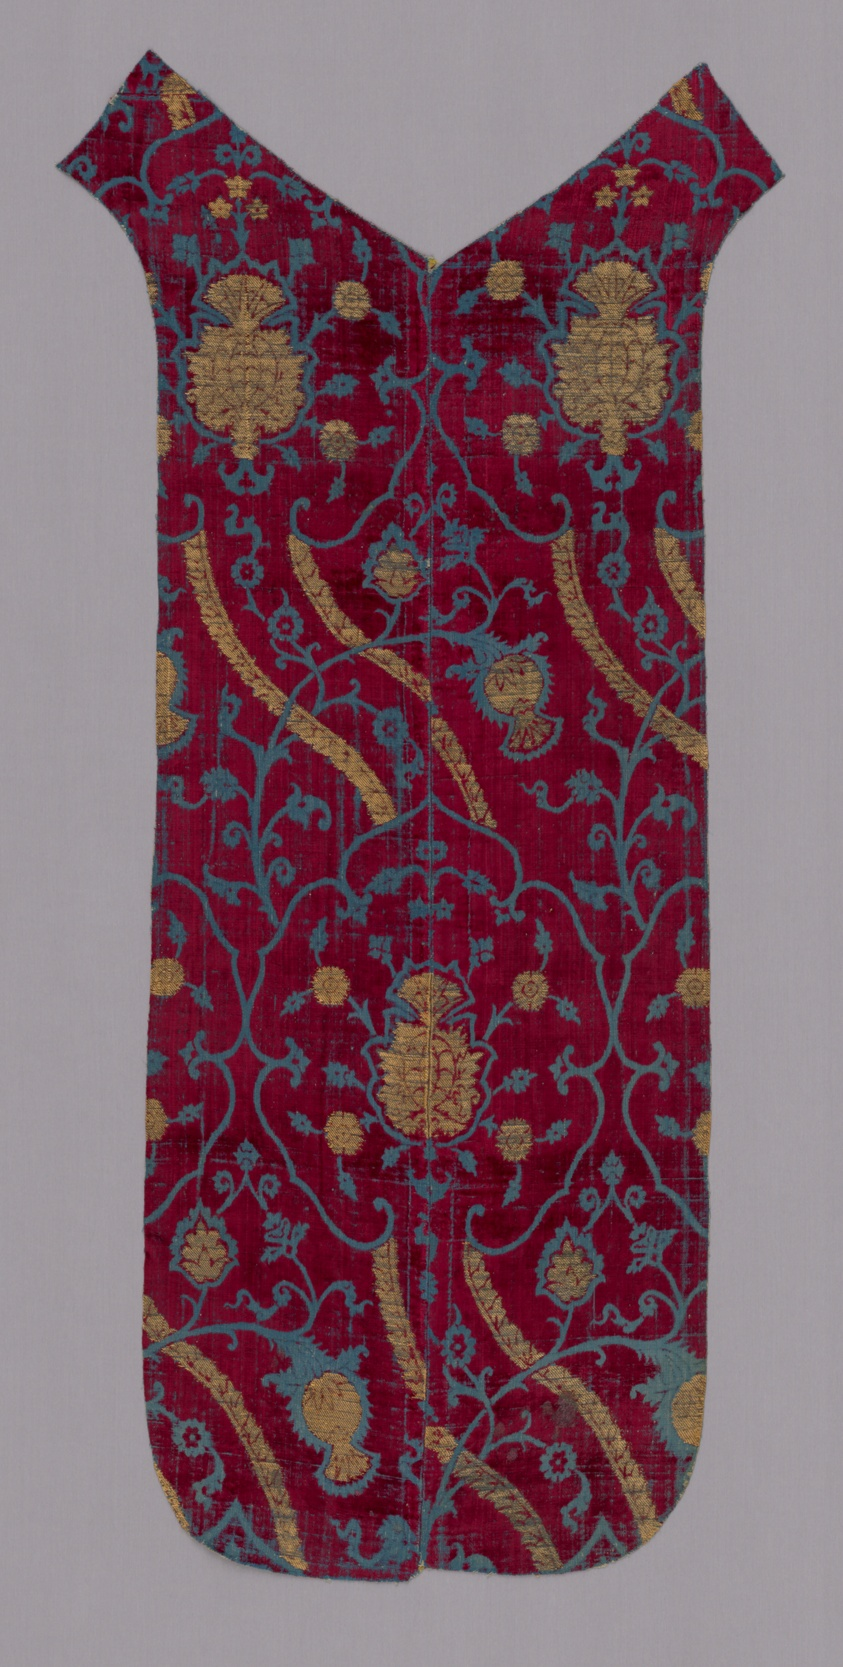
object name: Textile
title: Portion of a Chasuble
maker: Italy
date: 1450/1500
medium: Silk and gilt-metal-strip-wrapped silk, warp-float faced 4:1 satin weave with supplementary brocading wefts and supplementary pile warps forming cut voided velvet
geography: Italy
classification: textile; weaving - velvet; liturgical